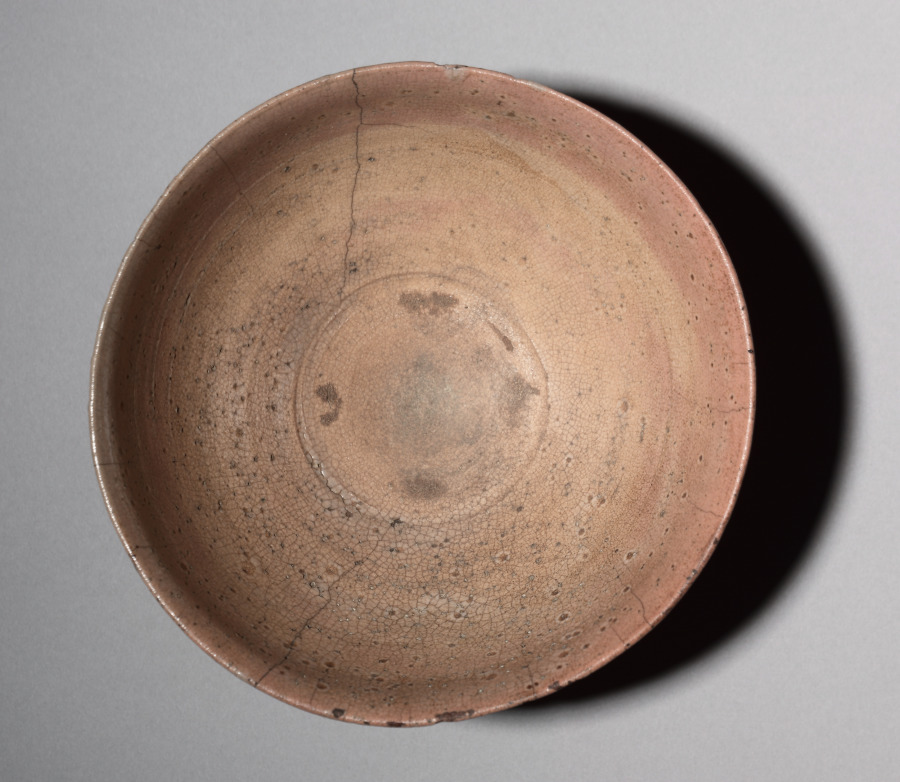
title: Tea Bowl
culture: Japan, Momoyama period (1573–1615)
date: c. 1600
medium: Glazed stoneware (Karatsu ware)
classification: Ceramic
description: Wide-mouthed bowls were used for consuming whipped tea such as that imbibed during the tea ceremony. Karatsu ware like this was among the most prized of such tea bowls. The port city of Karatsu in Saga prefecture in Kyushu was known for its kilns that produced high-fired, Korean-style glazed pottery. The Japanese ruler Toyotomi Hideyoshi invaded Korea in 1592 and 1597, returning with families of Korean potters as spoils of war. This region was one of the sites where these potters were resettled.